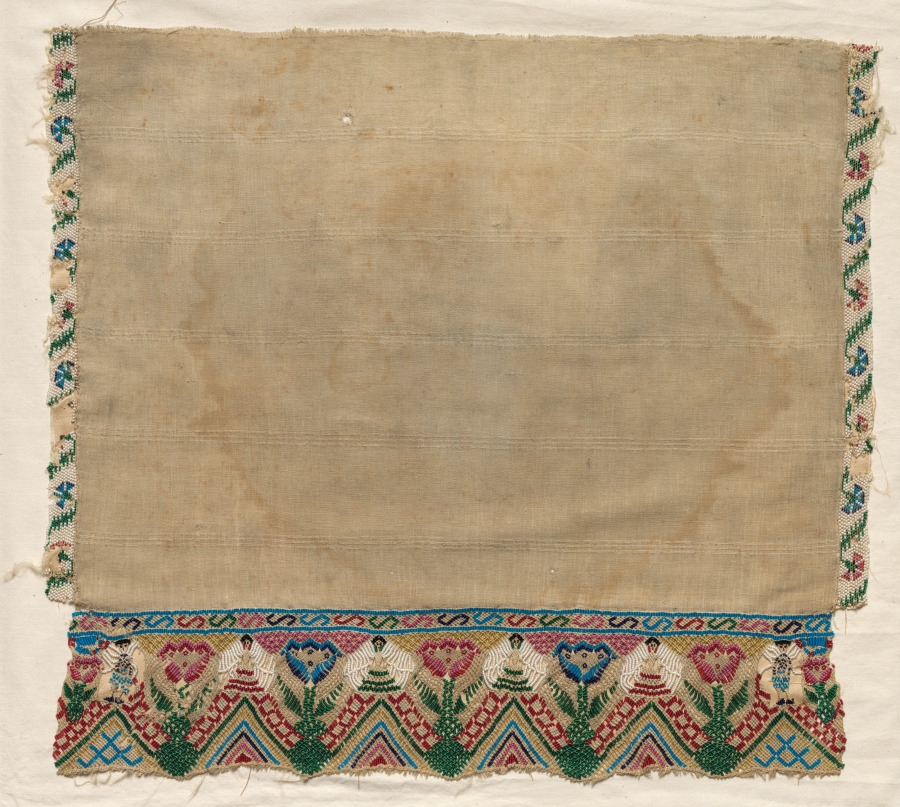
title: Towel End with Beaded Borders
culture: Mexico, early 19th century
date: early 1800s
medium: embroidery; cotton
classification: Embroidery